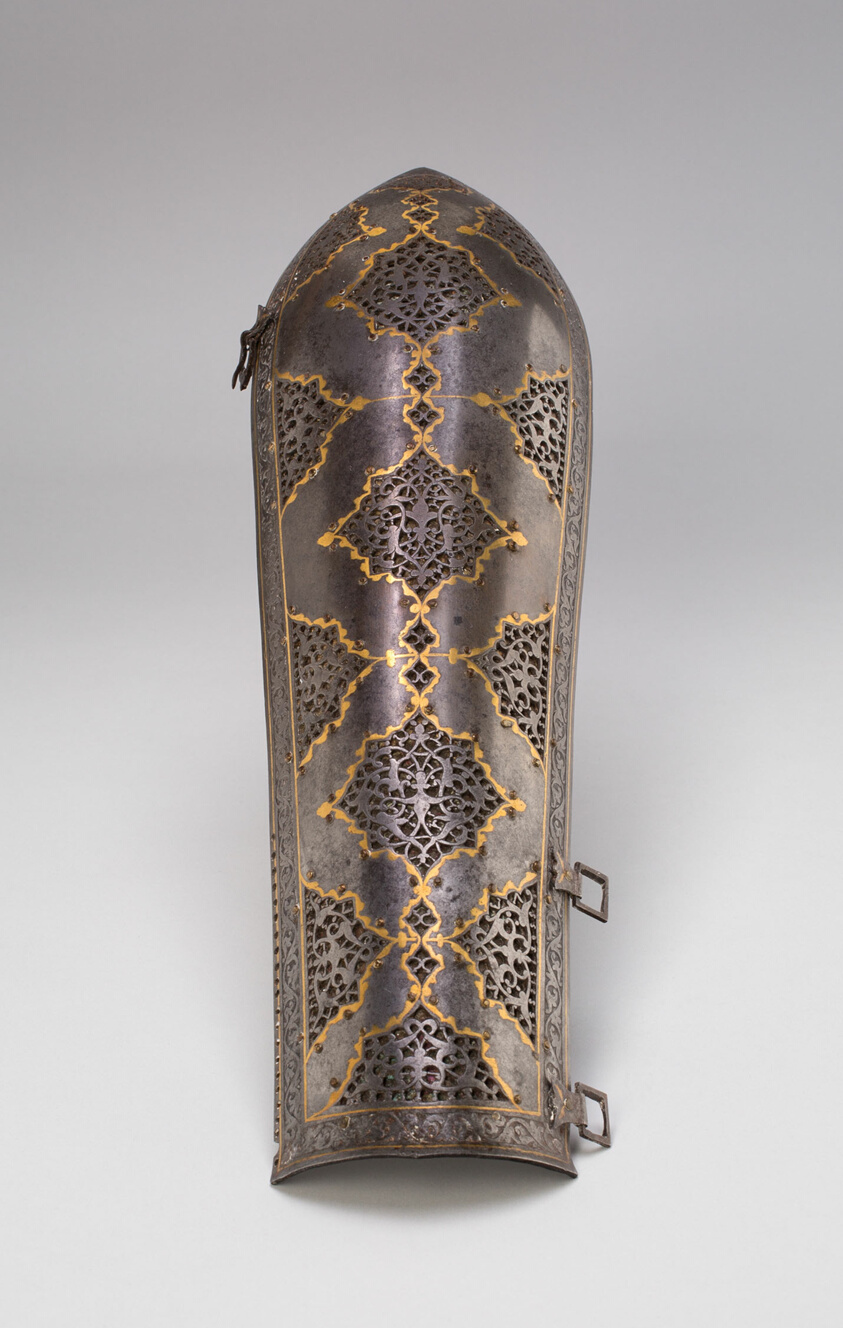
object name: Armor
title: Arm Guard from a Suit of Armor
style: isfahan, Islamic (culture or style)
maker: Iran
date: 18th century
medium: Steel inlaid with gold with engraved and pierced decoration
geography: Iran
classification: metal; metalwork; asian art; decorative arts